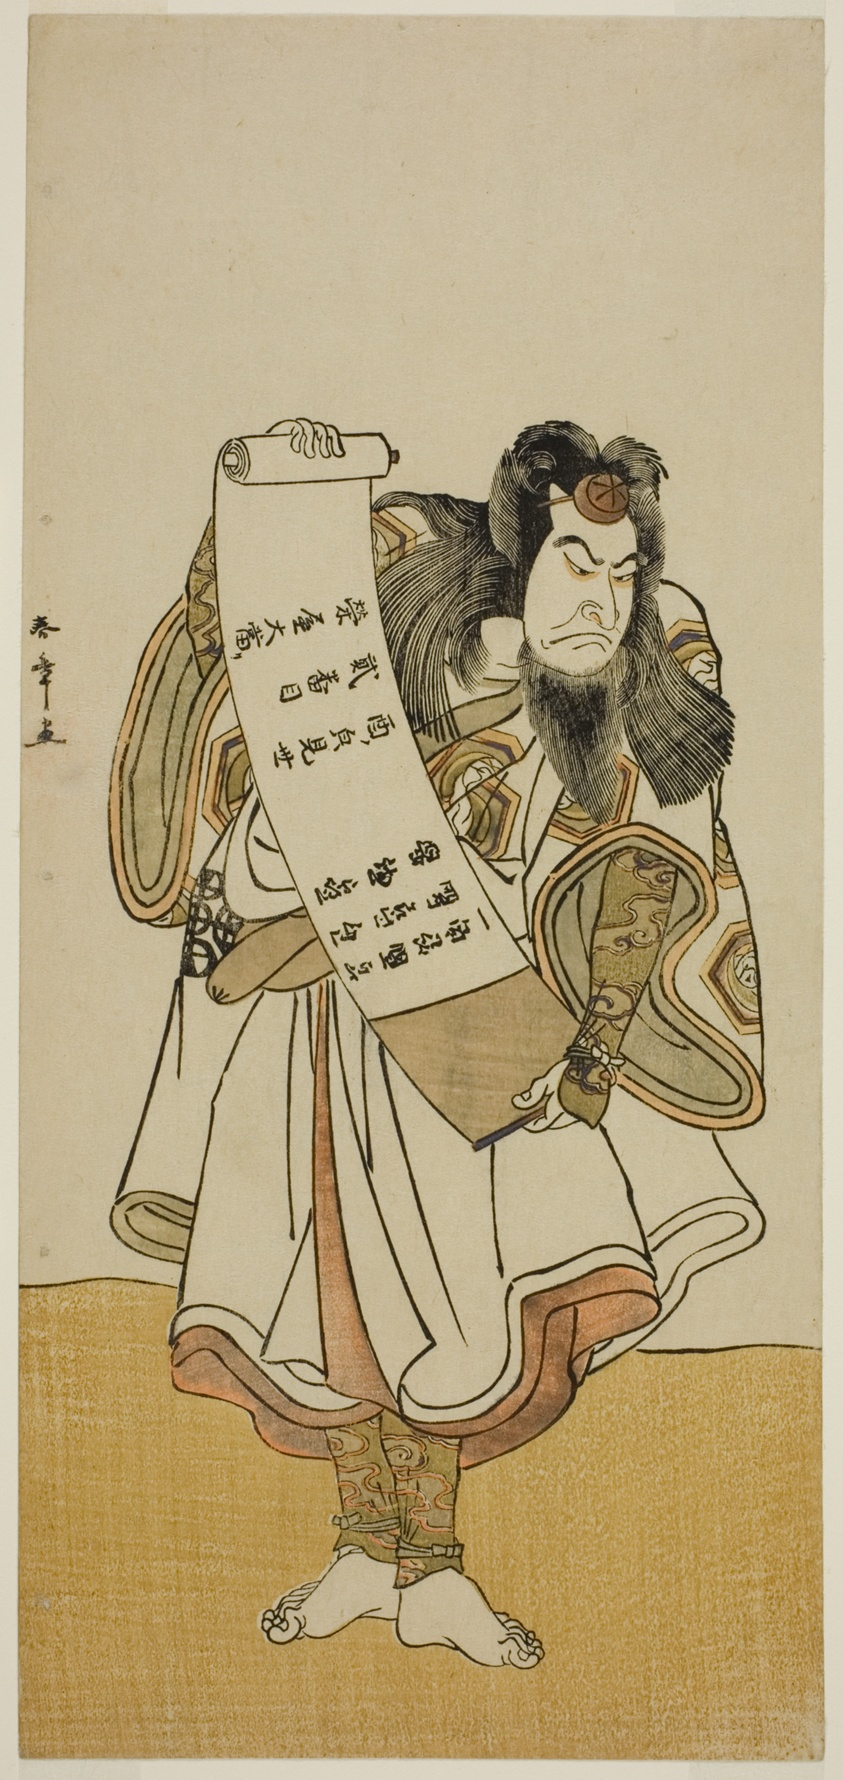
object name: Print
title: The Actor Nakamura Nakazo I as an Itinerant Monk in the Play Hikitsurete Yagoe Taiheiki, Performed at the Morita Theater in the Eleventh Month, 1776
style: Japanese (culture or style)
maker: Katsukawa Shunsho 勝川 春章; Japanese, 1726-1792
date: c. 1776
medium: Color woodblock print; hosoban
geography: Japan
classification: woodblock print; print; asian art